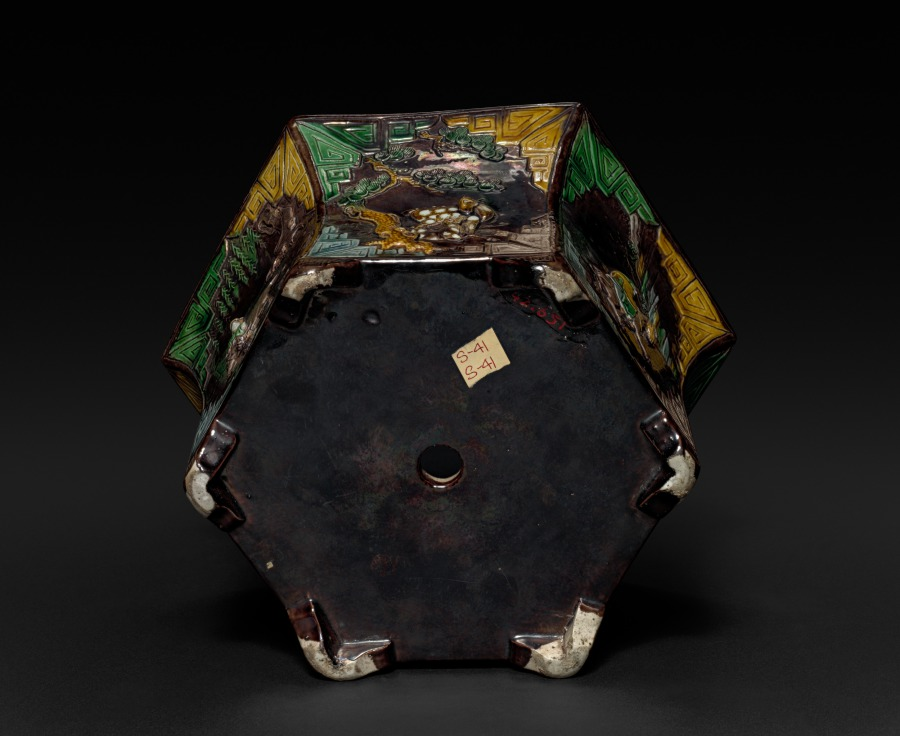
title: Cachepot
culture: China, Qing dynasty (1644-1911), Kangxi reign (1661-1722)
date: 1662–1722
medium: porcelain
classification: Ceramic